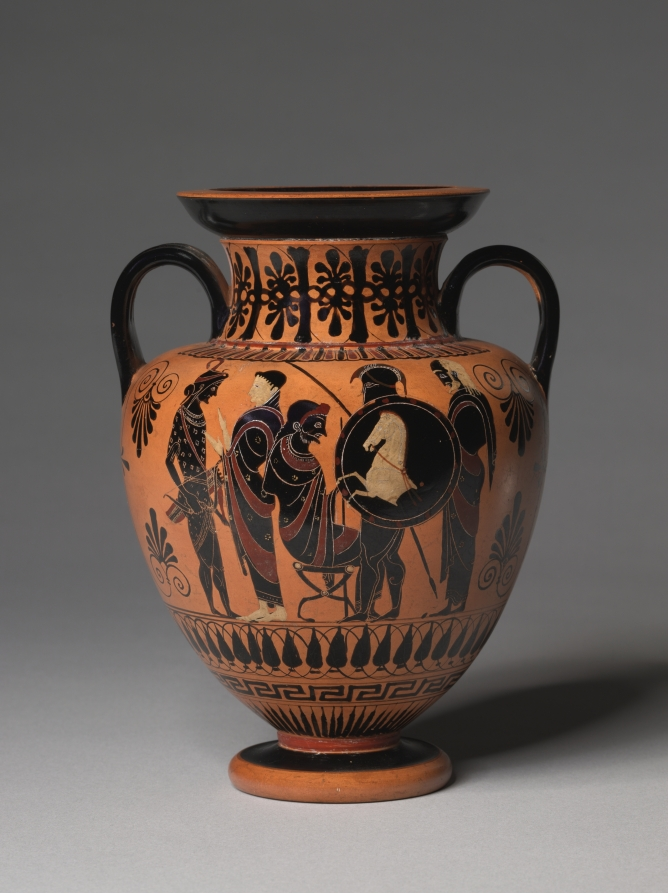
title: Black-Figure Neck-Amphora (Storage Vessel): Departing Warriors (A); Dionysos and Satyrs (B)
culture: Greek, Attic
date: c. 520–510 BCE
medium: ceramic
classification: Ceramic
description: Small in scale but finely painted and well preserved, this amphora depicts two common but unrelated subjects: the departure of warriors (side A) and Dionysos and two satyrs (side B). The warriors include an archer, identified by his bow and quiver full of arrows, and a heavily armed foot-soldier, wearing helmet and greaves and holding a spear and shield emblazoned with a horse protome. The archer faces a woman, while the warrior stands between two men.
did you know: A neck-amphora is a type of amphora with separately constructed neck and body.